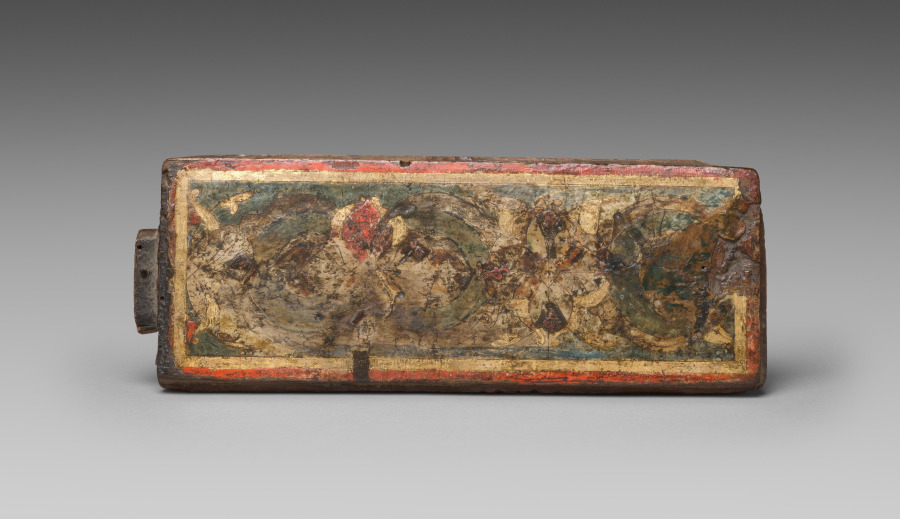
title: Reliquary Box with Scenes from the Life of John the Baptist (lid)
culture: Byzantium, Constantinople, late Byzantine period, 14th century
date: 1300s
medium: tempera, gold, wood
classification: Wood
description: John the Baptist--the first person to recognize Christ as the promised savior and the one who baptized him in the Jordan River--was one of the Byzantine Empire’s most revered saints. This box shows four scenes from the saint’s life: John’s martyrdom, Christ’s baptism, John’s birth, and the announcement of his birth to his parents. It probably once housed one of the saint’s relics; several were kept in churches and monasteries in Constantinople, including fragments of his skull and right arm and locks of his blood-clotted hair.